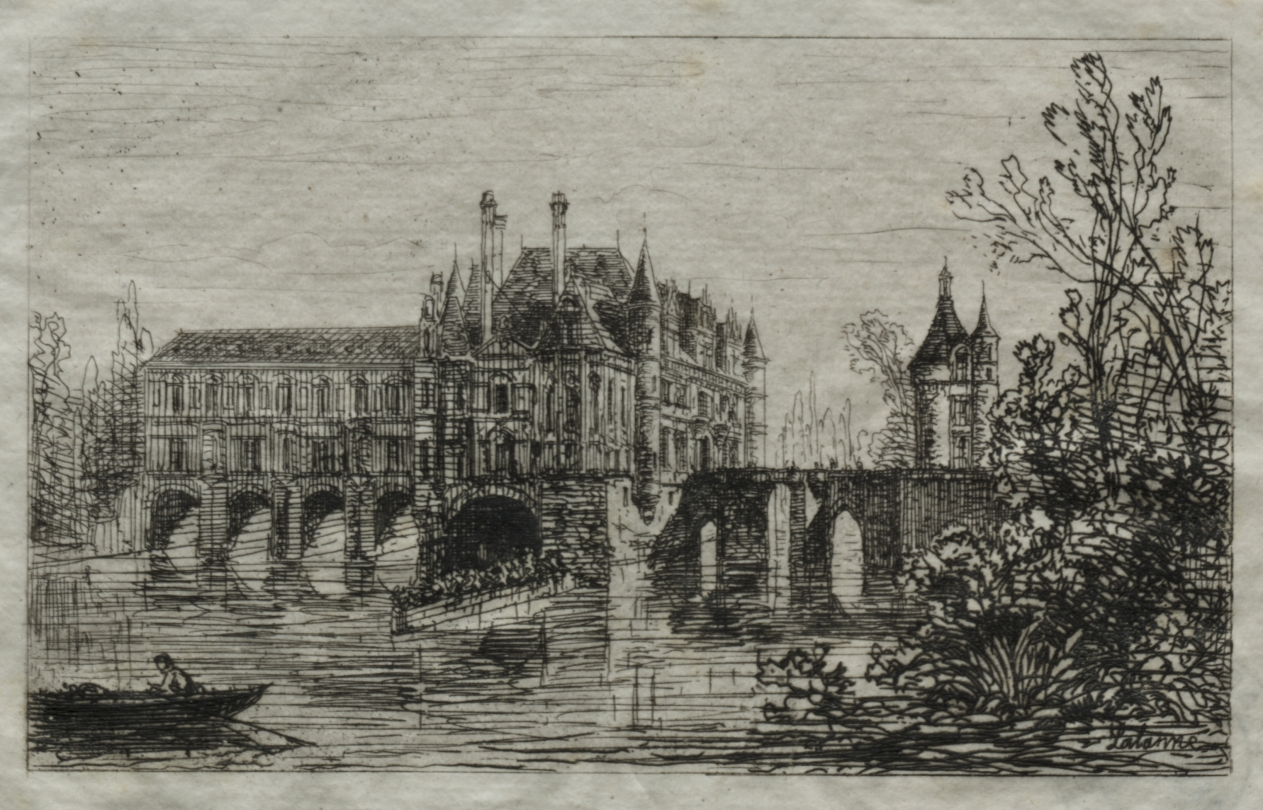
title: Château de Chenonceau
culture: France, 19th century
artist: Maxime Lalanne (French, 1827–1886)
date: 1865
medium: etching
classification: Print